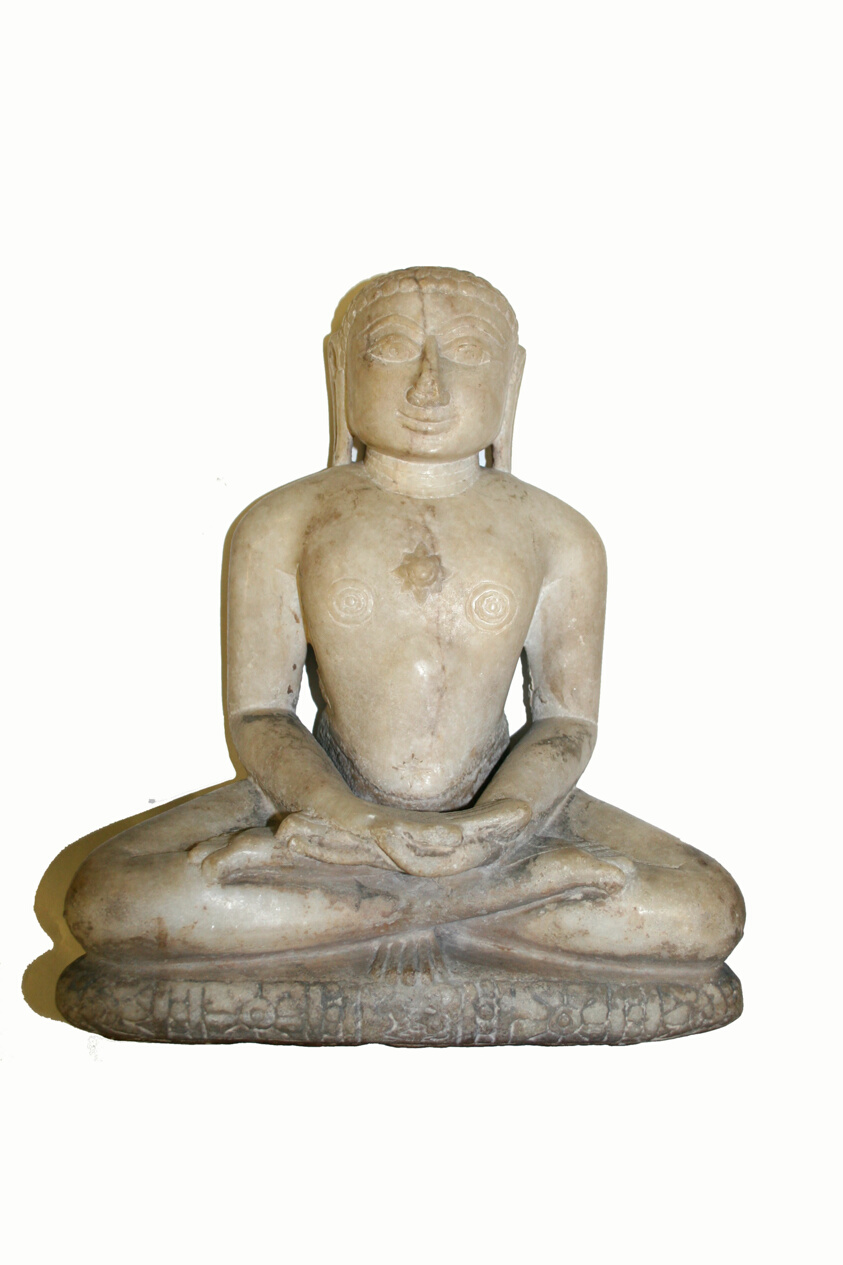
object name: Sculpture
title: Jaina Tirthankara Seated in Meditation (Dhyanamudra)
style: South Asian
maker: India; Gujarat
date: 15th century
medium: White marble with traces of pigment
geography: Gujarat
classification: stone (unidentified); stone; sculpture; asian art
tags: Jain, gods (deities), religion, Jaina, Jainism